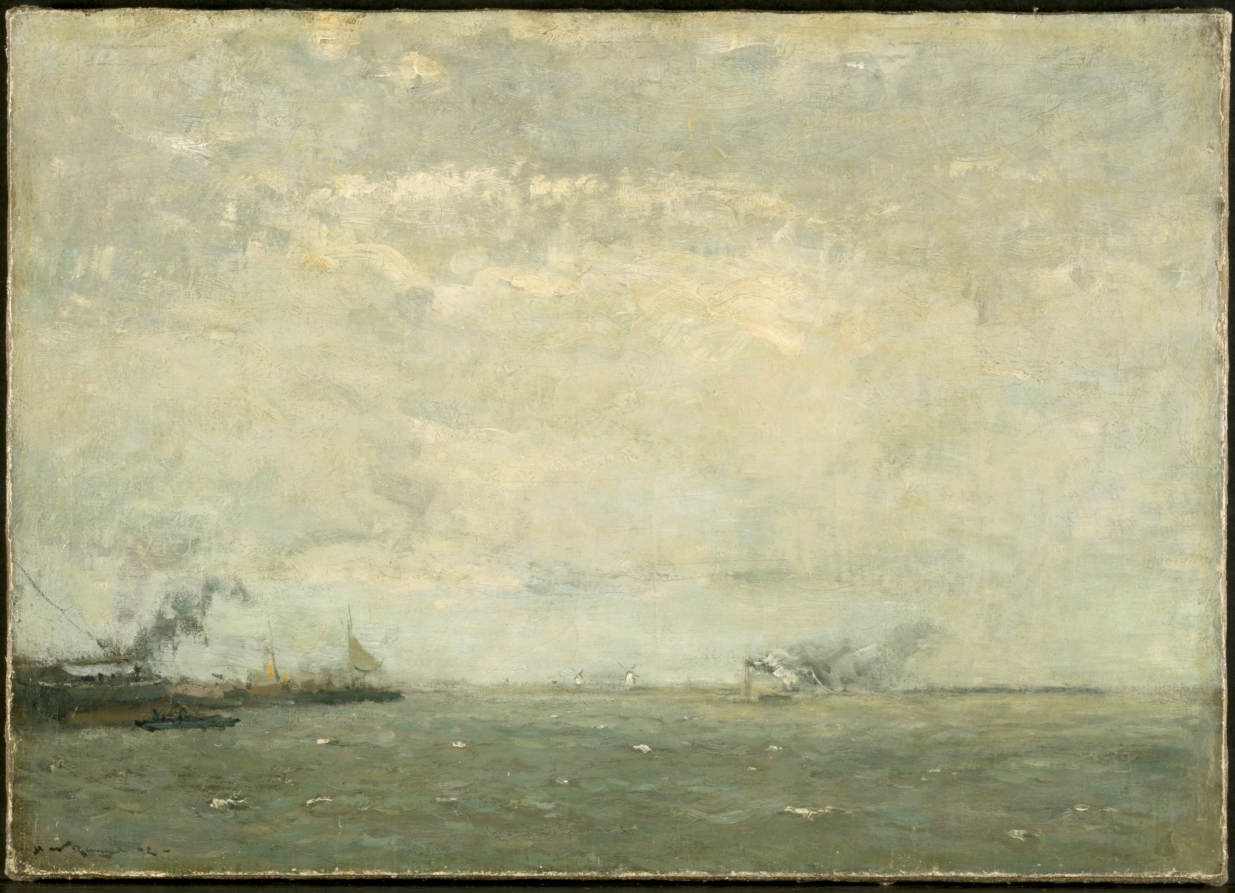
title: Seascape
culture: America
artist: Henry Ward Ranger (American, 1858–1916)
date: 1892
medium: oil on canvas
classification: Painting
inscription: Signed lower left: "Henry Ranger 92"